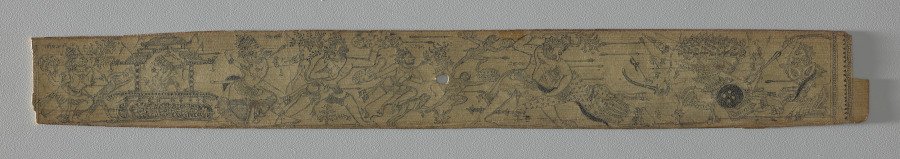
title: The Monkeys and Bears Fight Ravana and His Demons (verso), from a Romance of Chandrabhanu and Lavanyavati of Upendra Bhanja (Indian, died 1740)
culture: Eastern India, Odisha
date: late 1700s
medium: Charcoal on palm leaf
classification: Painting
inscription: on both recto and verso in Oriya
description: This leaf from an 18th-century romance manuscript comes from a section of the book that retells the epic battle between the demon Ravana and the god-hero Rama. The 10-headed multiarmed demon Ravana is the second figure from the right. Rama’s army of monkeys and bears, wielding tree branches and clods of earth, fill the remainder of the leaf. The images were created using a stylus that incised into the palm leaf; charcoal was then rubbed over the leaf and wiped off, leaving only the incised areas in black.